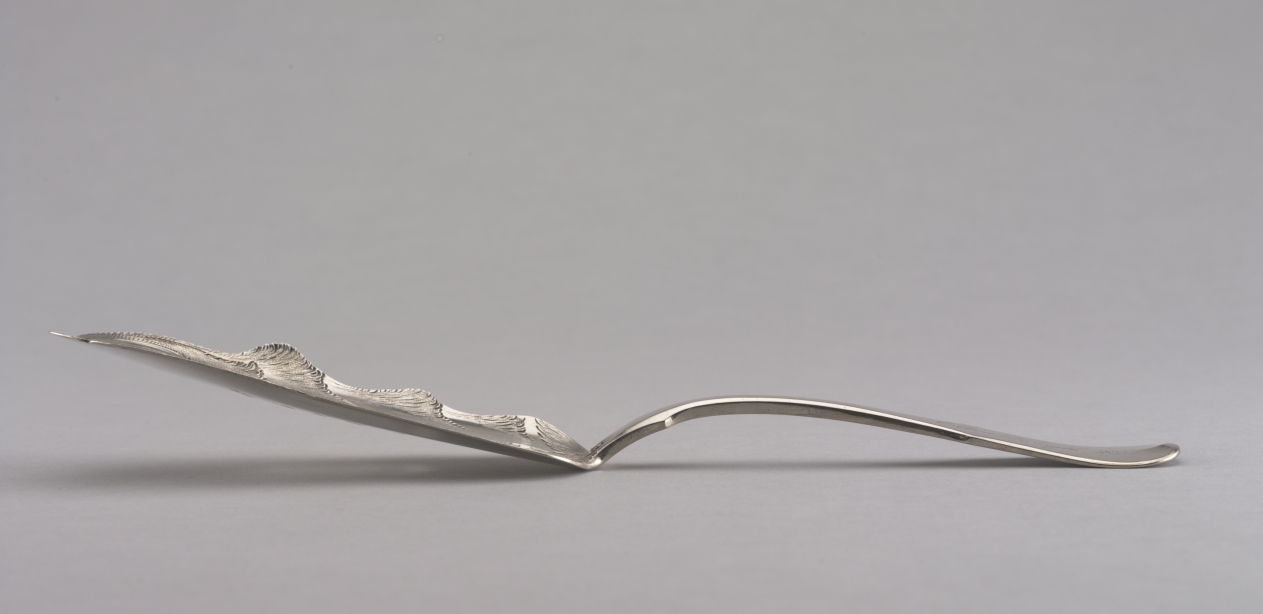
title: Fish Slice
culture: America, Maryland, Baltimore, 19th century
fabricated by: Samuel Kirk (American, 1793–1872)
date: c. 1824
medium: silver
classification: Silver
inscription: engraved: "Ellen Forsyth 1824" in script along top of handle end.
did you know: Look closely at the delicate details of this utensil. Often the decoration reveals the function of these special pieces. For what purpose do you think this was used?